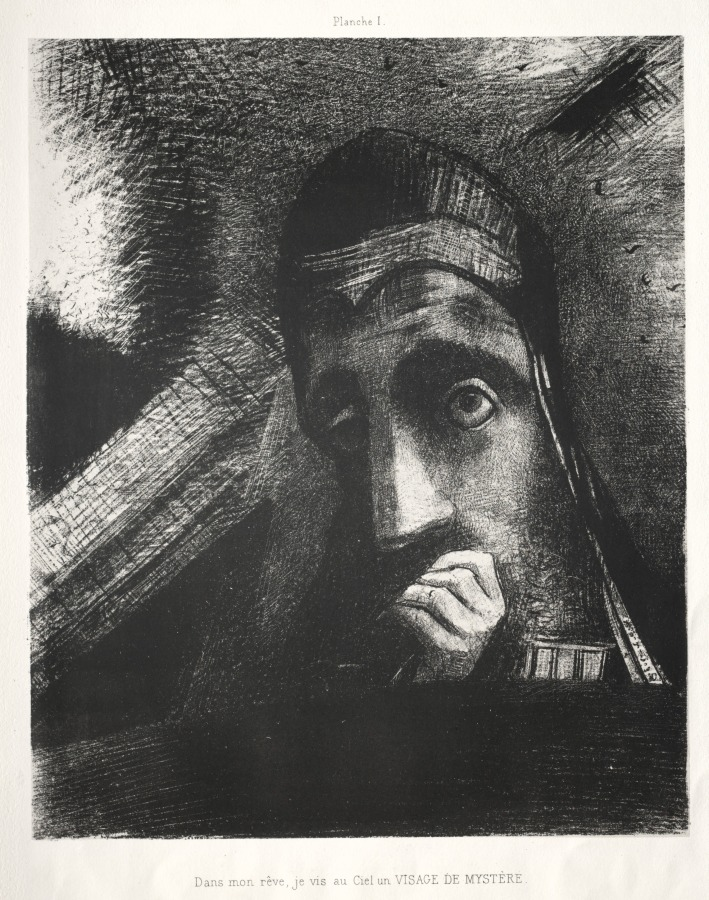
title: Homage to Goya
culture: France, 19th century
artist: Odilon Redon (French, 1840–1916)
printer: Lemercier & Cie.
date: 1885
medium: six lithographs on China paper laid on wove paper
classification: Print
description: This series is one of many that Odilon Redon created throughout his career. Nearly two-thirds of his lithographs took the form of portfolios—prints connected conceptually by a theme or narrative and physically by a folder or binding. Such works were often dispersed over time, but Cleveland was fortunate to acquire several complete sets with their original covers during the 1920s. Dating from Redon’s early experimentation with lithography, Homage to Goya was intended as a tribute to 18th-century Spanish master Francisco de Goya, whose interest in dreams and the subconscious influenced Redon. The six seemingly unrelated images celebrate Goya’s ambiguity and collectively suggest the introspection and isolation of artistic practice.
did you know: This portfolio was published in an edition of 50, one of which Redon sent to poet Stéphane Mallarmé soon after Redon became a frequent participant in a literary salon held regularly at Mallarmé's home.